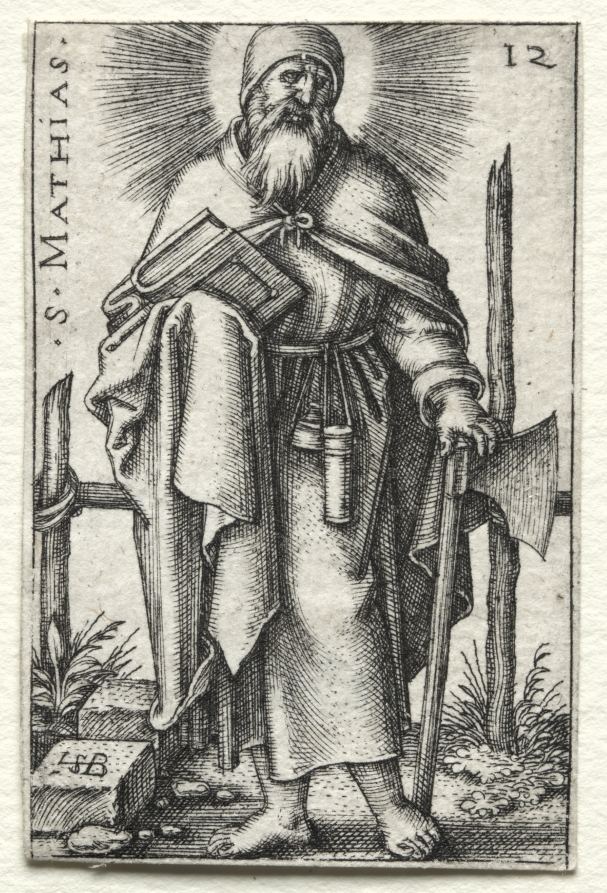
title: St. Matthew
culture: Germany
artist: Hans Sebald Beham (German, 1500–1550)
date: 1545–1546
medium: engraving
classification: Print